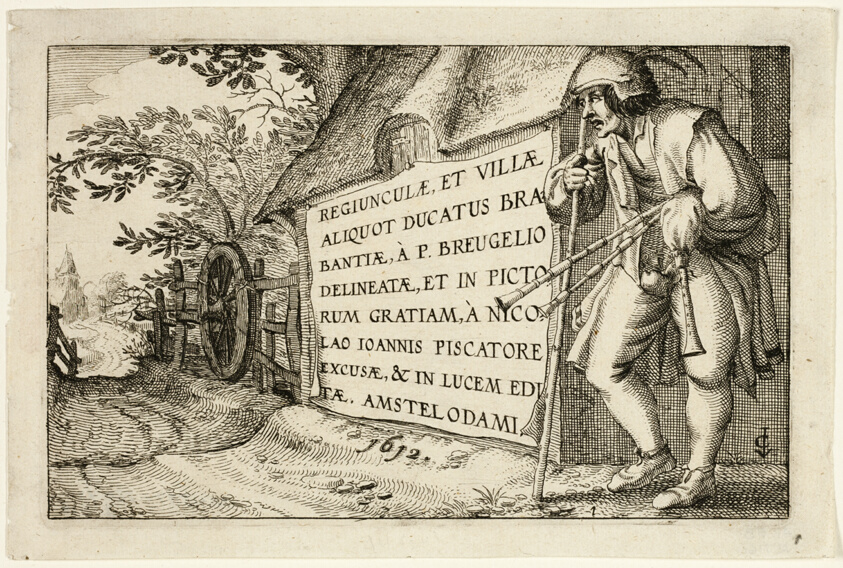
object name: Print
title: Title Page, after Pictures of Farms, Country Houses and Rustic Villages (Praediorum villarum et rusticarum casularum icones)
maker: Claes Jansz. Visscher (Dutch, 1587-1652); after Unknown Flemish Artist, misidentified as Pieter Bruegel, the elder (Flemish, 1525/30-1569)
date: 1612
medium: Etching in black on ivory laid paper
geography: Netherlands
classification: etching; print; prints and drawing